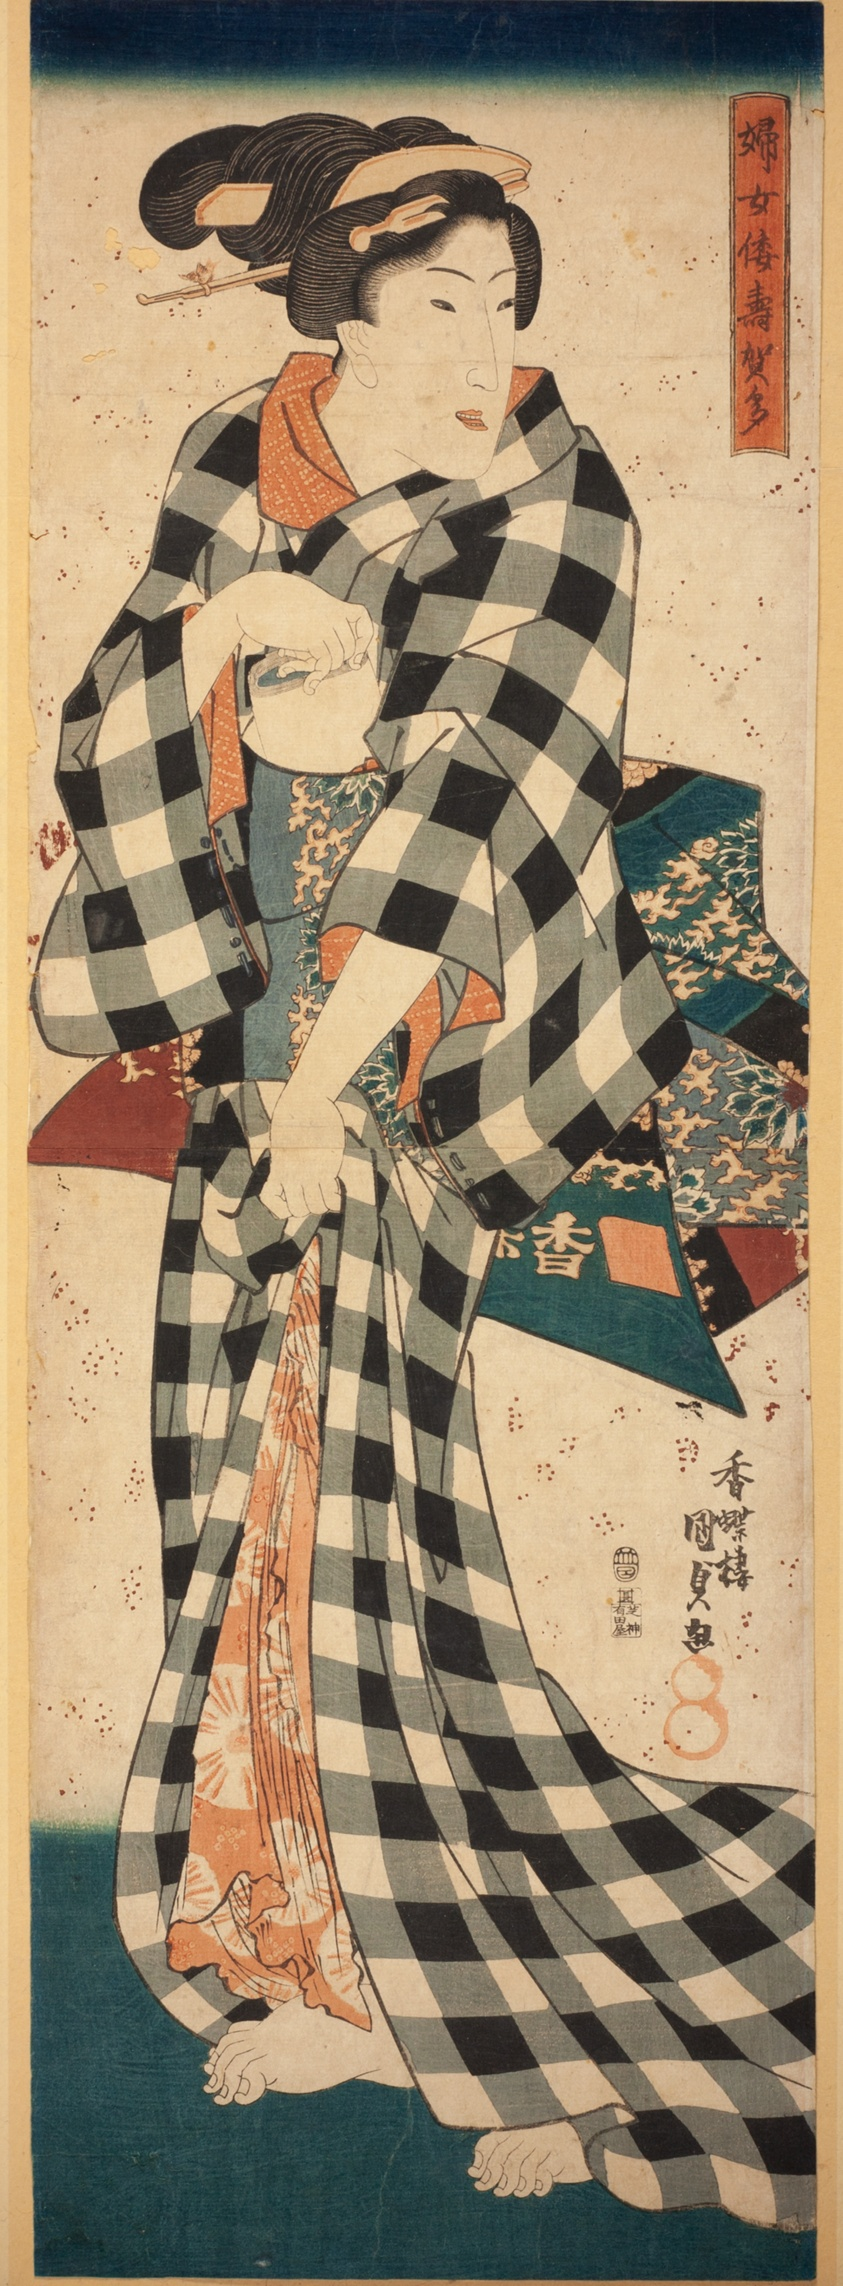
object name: Print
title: Image of a Japanese Woman (Fujo Yamato sugata)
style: Japanese (culture or style), edo (japanese period), Japanism, East Asian, asian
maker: Utagawa Kunisada I (Toyokuni III) (Japanese, 1786-1864)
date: c. 1830/35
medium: Color woodblock print; vertical oban diptych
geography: Japan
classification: woodblock print; print; asian art